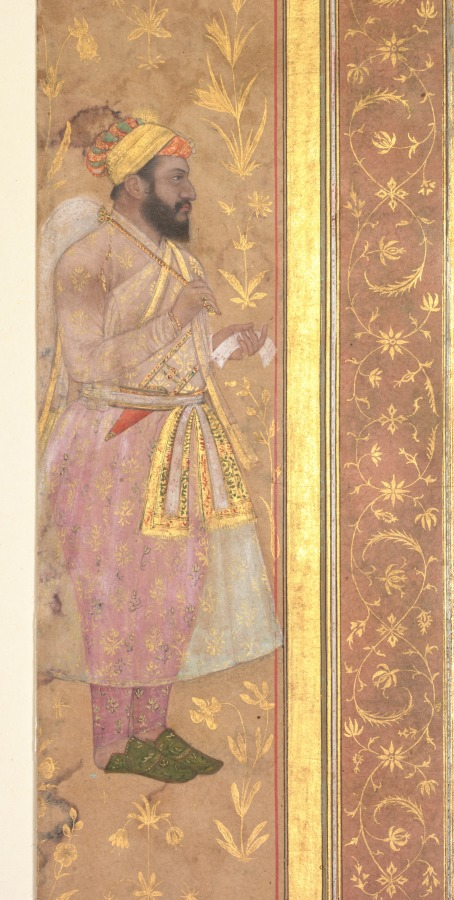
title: Shah Jahan holding a spinel and a long Deccan sword, from the Late Shah Jahan Album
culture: India, Mughal, 17th century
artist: attributed to Hashim (Indian, active 1598-c.1650)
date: c. 1650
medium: Gum tempera and gold on paper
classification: Painting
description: This page came from an imperial album assembled for Shah Jahan toward the end of his reign. Only portraits of the emperors have angels hovering with a crown in the top border along with the predator peacefully paired with his prey below. Shah Jahan chose to link these symbols of peace and justice with divine sanction for his rule, as indicated by the light of the sun and moon behind his head. Royal retainers carry emblems of sovereignty in the left border. Imperial Mughal painting reached a pinnacle of refinement and formality under Shah Jahan. The artists reveal astonishing skill in their ability to render the subtle texture of the feather in his turban crest, the gleam of every jewel, the softness of his beard, and the delicacy of his costly translucent muslin robe. In his hand Shah Jahan holds a ruby-like gemstone called a spinel, prized among the Mughals for its talismanic properties of protection during battle.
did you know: The finest fabric was the most transparent, like the Emperor’s New Clothes.